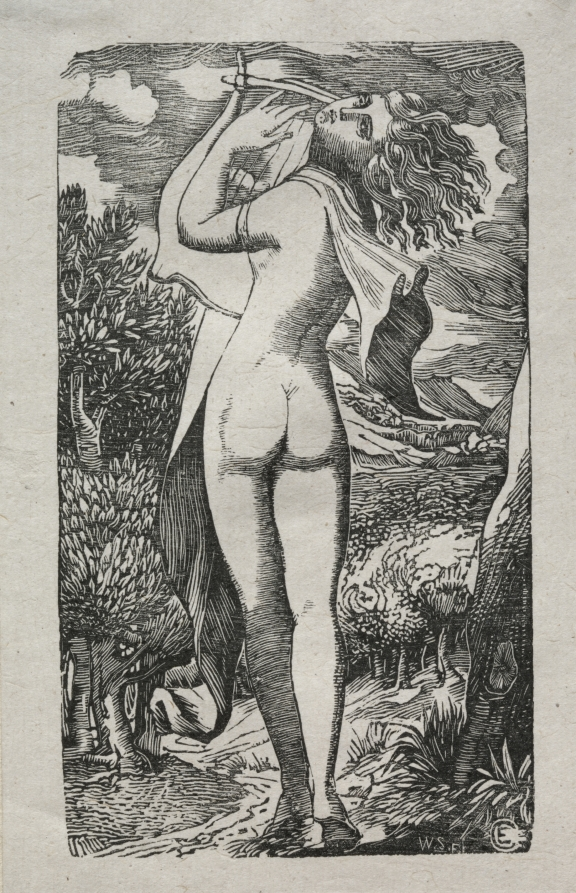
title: Bacchante or The Player on The Lyre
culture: England, 19th century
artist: Edward Calvert (British, 1799–1883)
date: 1829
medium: wood engraving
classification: Print